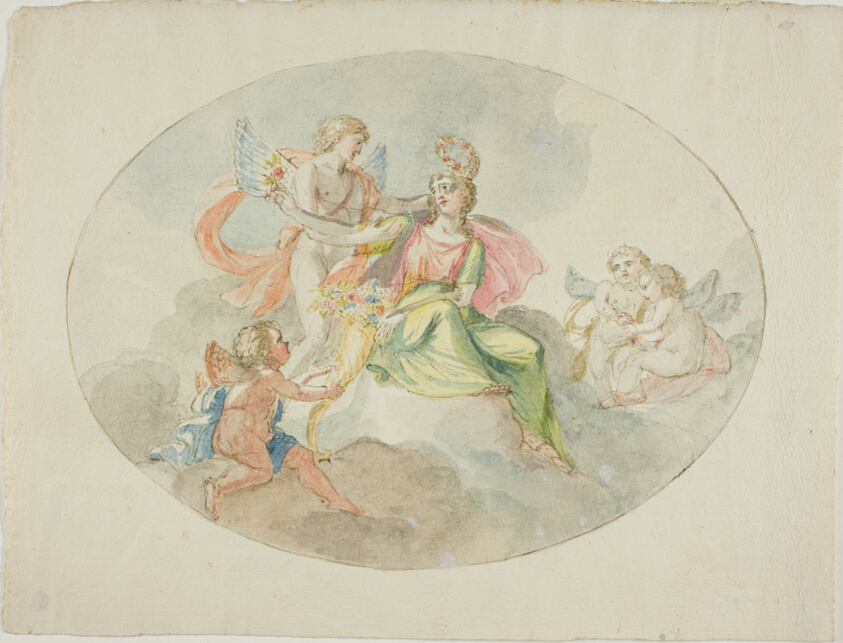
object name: Drawing and Watercolor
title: Allegory of Abundance (Sketch for a Ceiling Painting)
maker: Attributed to Domenico Pozzi; Italian, 1744-1796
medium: Pen and brown ink, with brush and watercolor, over black chalk on ivory laid paper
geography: Italy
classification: watercolor; drawings (visual works); prints and drawing